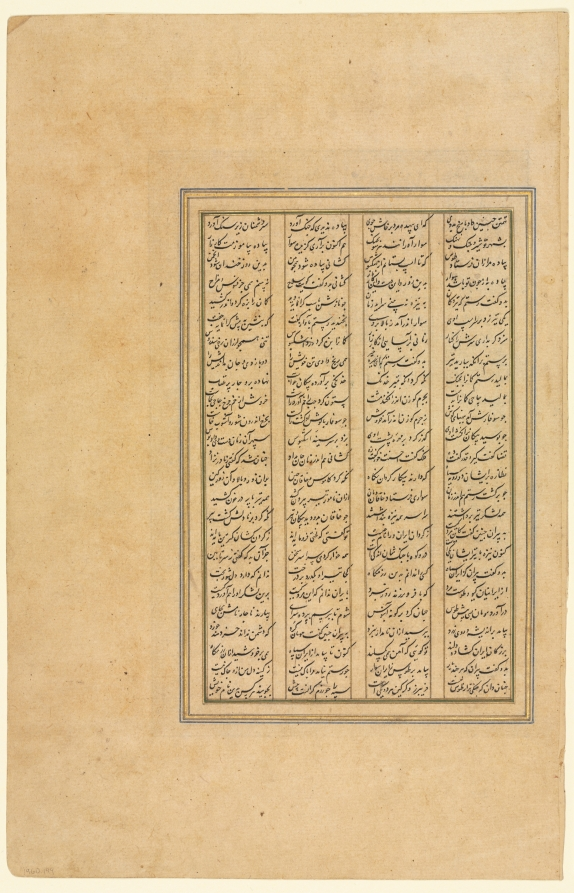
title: Page from a Shah-nama (Book of Kings) of Firdausi (Persian, about 934–1020)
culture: Iran, Shiraz, Safavid period (1501-1722)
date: c. 1590–1600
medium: Opaque watercolor, ink, and gold on paper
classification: Manuscript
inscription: Script: Nasta'liq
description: Iran was losing a battle against Turan and the armies of its assembled allies from India and China. The hero Rustam arrived to pull the Iranian army back from the brink of destruction, slaying the enemy warrior Ashkabus on foot while allowing his horse Rakhsh to rest after a long, hard journey. The vast number of armies involved in the battle is indicated by the many banners that extend beyond the illustration’s top border. The painting on the verso was probably produced at Shiraz, one of Iran’s major cultural centers, far to the south of the Safavid capital of Tabriz. Artists and works of art moved back and forth steadily between Shiraz and the Deccan in southwestern India during the 1500s and 1600s. The section of the Shah-nama written on the recto is famous for the clever conversational repartee between Rustam and his opponent Ashkabus. When Ashkabus remarked that in choosing not to ride a horse Rustam had signed his own death warrant, Rustam retorted, “Would it be the case then that in your country . . . lions, tigers, and crocodiles [all] ride on horses to battle?” Rustam then brought down the horse of Ashkabus with a single arrow; his next arrow pierced Ashkabus in the chest.